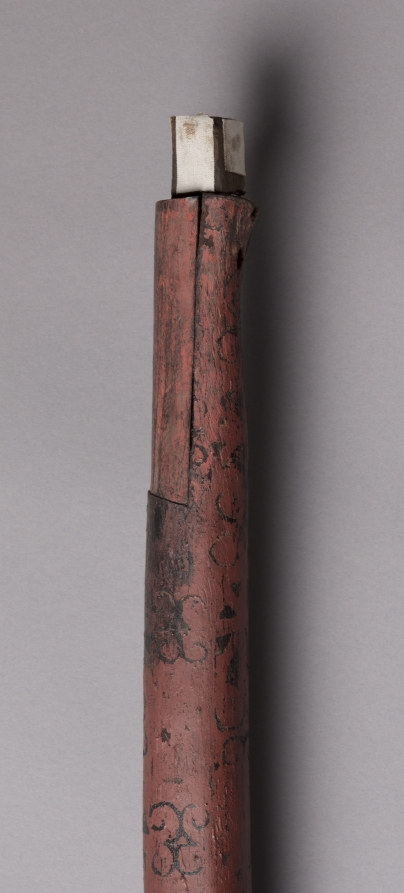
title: Cranes and Serpents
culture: China, reportedly from Hunan province, Changsha, Warring States period (475–221 BCE), State of Chu (c. 1046–223 BCE)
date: 475–221 BCE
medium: lacquered wood with polychromy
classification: Sculpture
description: A different style of ritual art developed in the state of Chu in South China. In addition to bronze vessels, lacquered wood artifacts expanded the repertory of ritual implements. This extraordinary sculpture was probably a drum stand for supporting a suspended drum in ritual ceremonies. It is unique among other excavated drum stands of the Chu, which typically show two birds standing on tigers. The theme of the bird stepping on the serpent was common in the Chu visual culture. Yet the slender proportions and seemingly flimsy structure of this particular set raise the question of whether it was utilitarian or mostly served symbolic functions in the tomb. The birds' and serpents' bodies have designs painted in red lacquer and yellow pigment against the black lacquer. Scientific analyses confirm the additional use of a blue or green pigment that has been discolored over time.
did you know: The cranes' long necks allowed a lightweight drum to be suspended from strings through the beaks, while the densely intertwined snakes provided a weighty base to stabilize the object during musical performances.